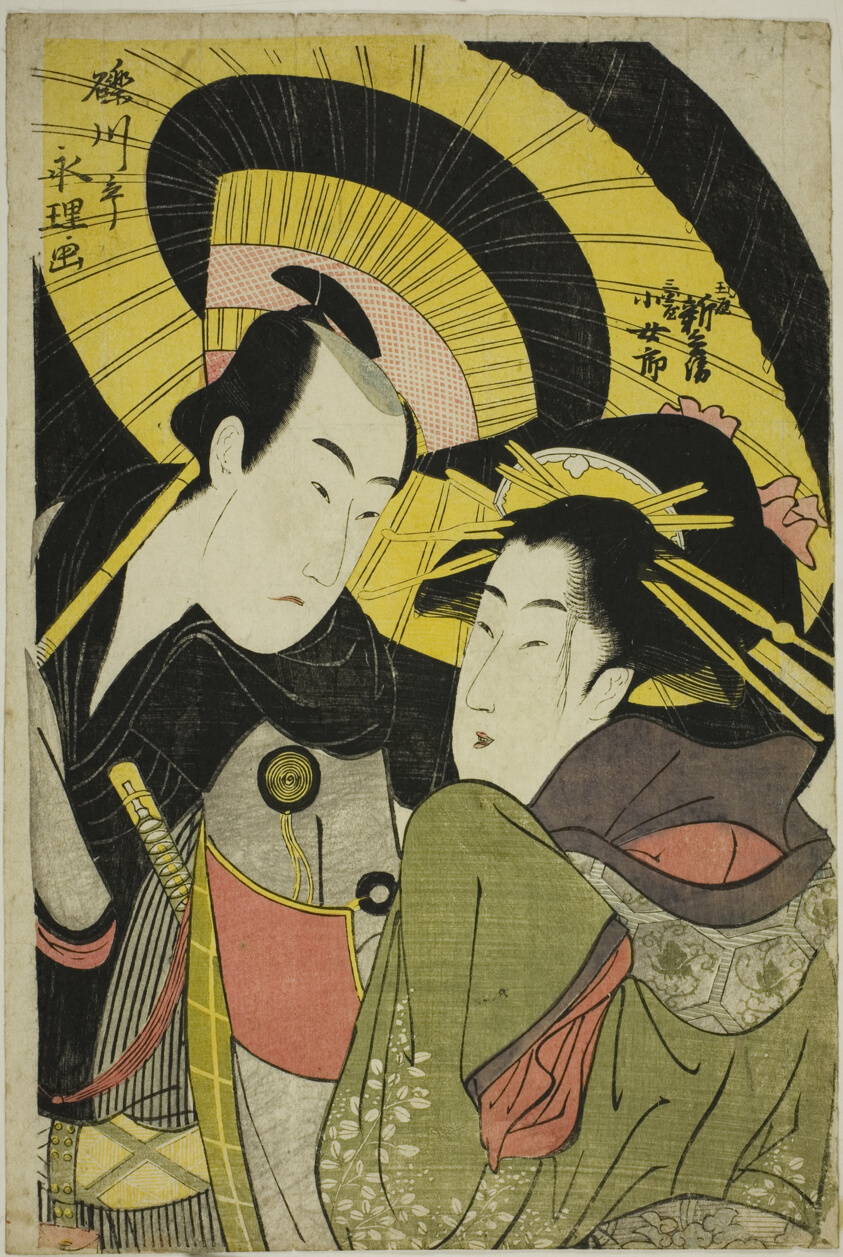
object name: Print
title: Tamaya Shinbei and Mikuni Kojoro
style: Japanese (culture or style)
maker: Rekisentei Eiri (Japanese, active c. 1781–1818)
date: c. 1781/1818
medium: Color woodblock print; oban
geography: Japan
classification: woodblock print; print; asian art